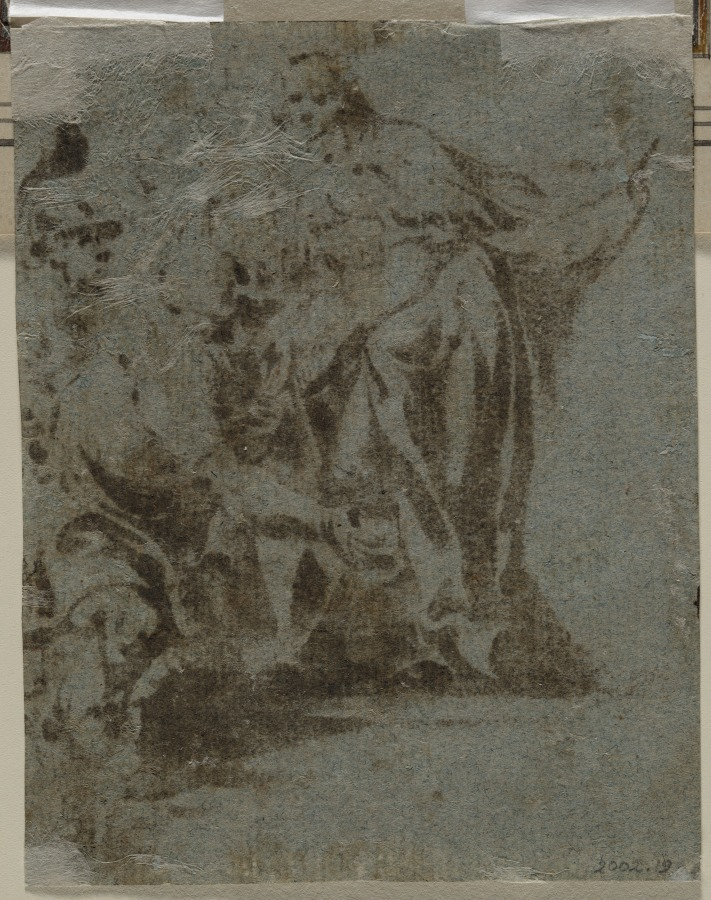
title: A Scene from Classical Mythology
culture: Belgium, 17th century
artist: Anthonis Sallaert (Flemish, c. 1590–1658)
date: 1600s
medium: monotype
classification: Print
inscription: bottom left, in brown ink: A. Diepenbeck; additional inscriptions on mounts Sotheby's sale 1799